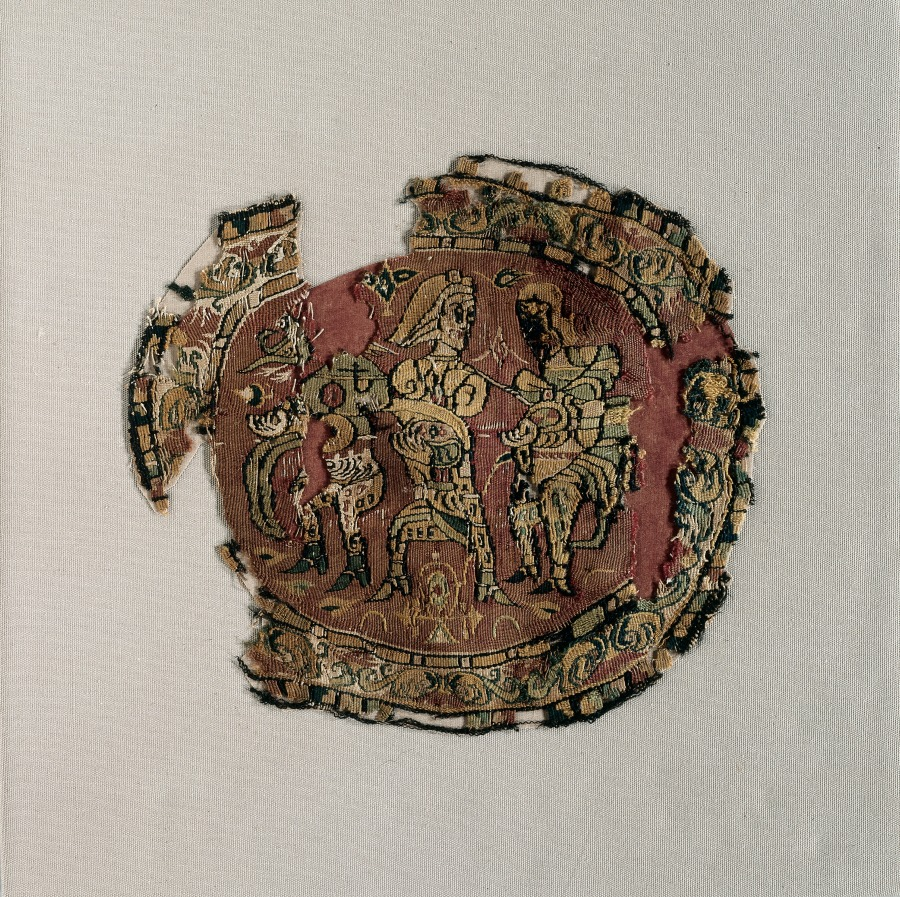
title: Three Figures from a Tunic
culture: Egypt, Abbasid period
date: 750–800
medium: tapestry weave; undyed linen and dyed wool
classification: Textile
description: Three figures are clothed in large shawls, spotted trousers, and riding boots. They awkwardly carry gifts in bowls or on trays, since their large hands and arms do not seem connected to their bodies.